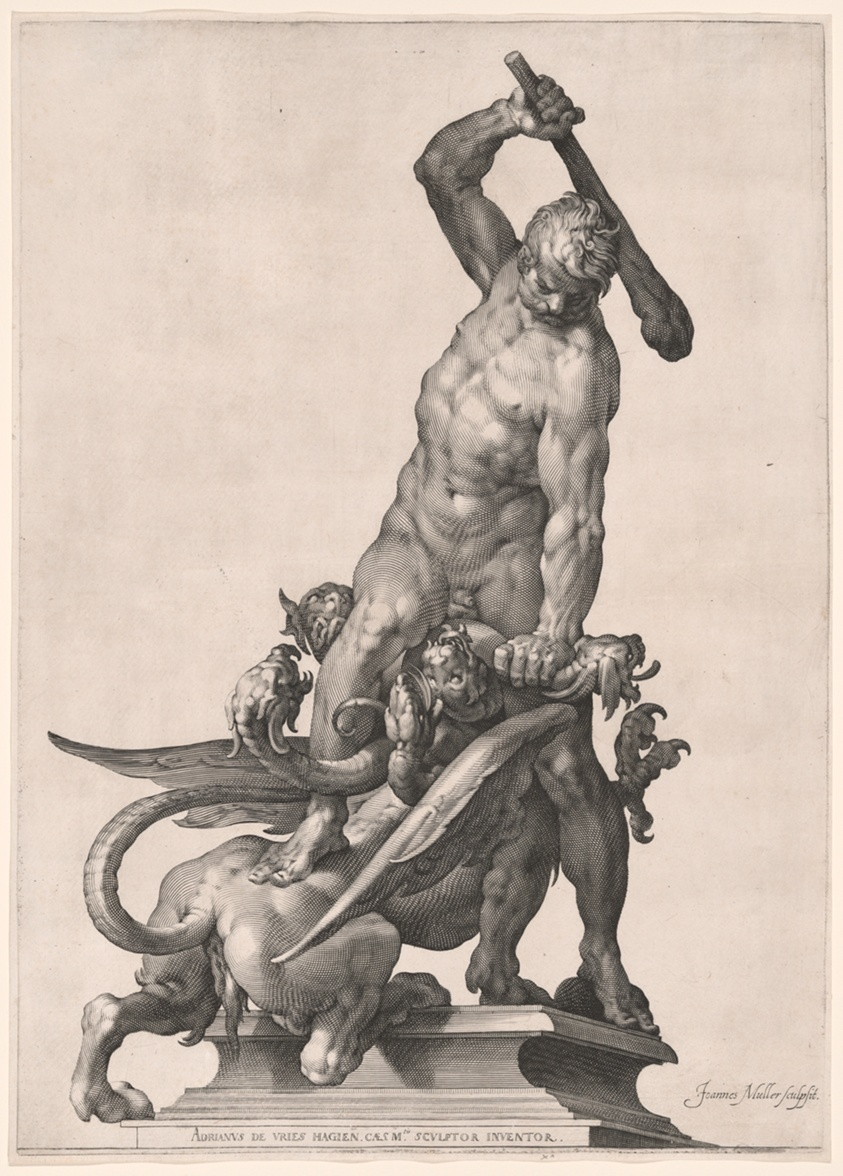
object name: Print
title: Hercules Slaying the Hydra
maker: Jan Harmensz Muller (Dutch, 1571–1628); after Adriaen de Vries (Dutch, c. 1566–1626)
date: c. 1602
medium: Engraving on ivory laid paper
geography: Netherlands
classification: engraving; paper; print; prints and drawing